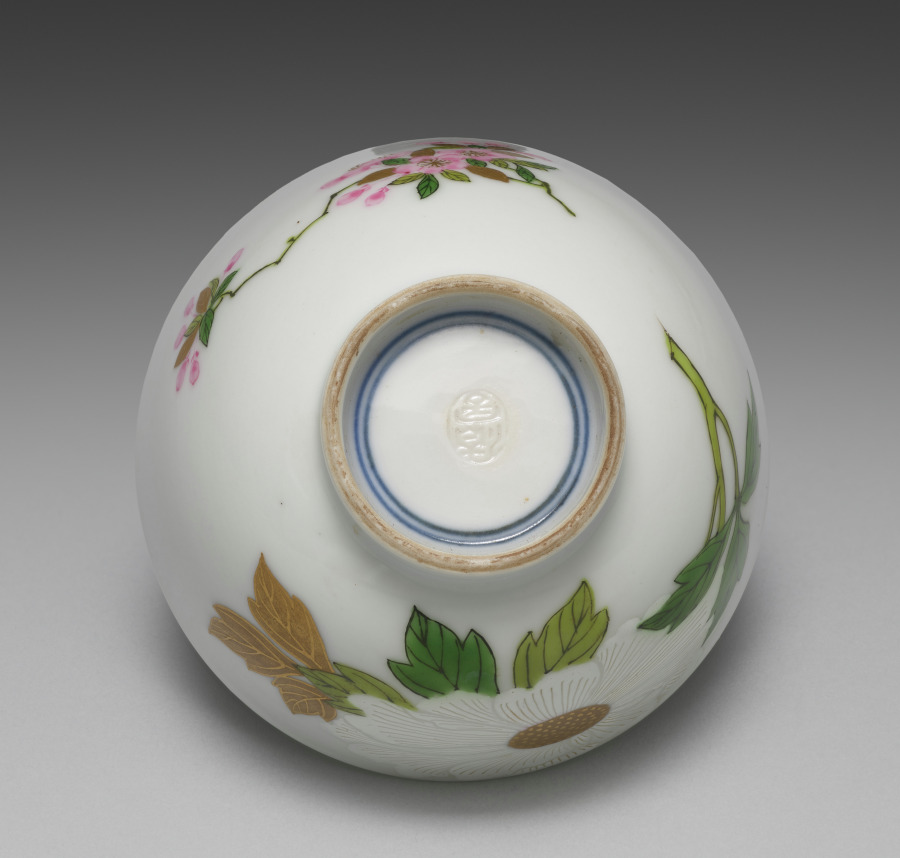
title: Teabowl from Teabowls with Peony and Crabapple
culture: Japan, Meiji period (1868–1912)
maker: Seifū Yohei III (Japanese, 1851–1914)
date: 1893–1914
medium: One from a set of five teabowls; porcelain with underglaze and overglaze color enamels and gold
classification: Ceramic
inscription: 清風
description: Overglaze color enamels are generally called iro-e (literally “color picture”) in the terminology customarily used for porcelain decoration of the Edo period. This set of teabowls is a fine example of Yohei III’s skilled use of the technique, which is identified on this set’s box lid with the alternate phrasing “porcelain with color painting” (jisaiga). Distinct from the way overglaze colors were used in Kakiemon ware from Arita, his designs and applications show a consciousness of porcelain decoration of the Qing dynasty. Here, he combines Chinese models with a sensibility taken from Kyoto ware precedents, including painting with powdered gold (kinrande). The colors used in the bowls are as follows: blue, black, gold, white, light green, green, and pink. The blue appears only inside the footring, as a double band of underglaze color. The black iron, used for stems and leaf veins, is painted over the glaze. The gold, also painted over the glaze, is used for leaves and the centers of flowers, for solid, glossy lines defining detail, or as a semimatte ground. The white of the peony flower is built up to a low relief over the glaze. Yohei has incised lines of varying widths into the pigment, carving away to the bowl’s surface, to differentiate individual petals and their rippled shapes. The light and dark greens, as well as the pink, are painted over the glaze. Of note is how Yohei has first used thinly applied lines of light green to draw the plum branch before applying the opaque iron black. For the plum buds and flowers, he has used a diluted pink with an opaque pink for outline, both over the glaze. In his later works, Yohei used pink both over and under the glaze in a manner similar to underglaze blue, and it can be challenging in some cases to discern which technique he has used. A lidded container in a private collection has a similar design but is augmented with the inclusion of white and purple magnolia blossoms. In contemplating the original decorative program of a set, of which these teabowls may have been a part, it is worth considering that perhaps not all objects included the full range of motifs. In such cases, the composition of the individual object may be best understood within the context of the extended ensemble. Here, the delicate pink plum on one side of the bowl seems slightly unbalanced with the bold white peony on the other, but when seen with other objects with the magnolia and its additional colors and shapes, it is possible to imagine a set with a complex, balanced design across multiple pieces.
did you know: Yohei III used the kinrande technique of painting with powdered gold to embellish the flowers.